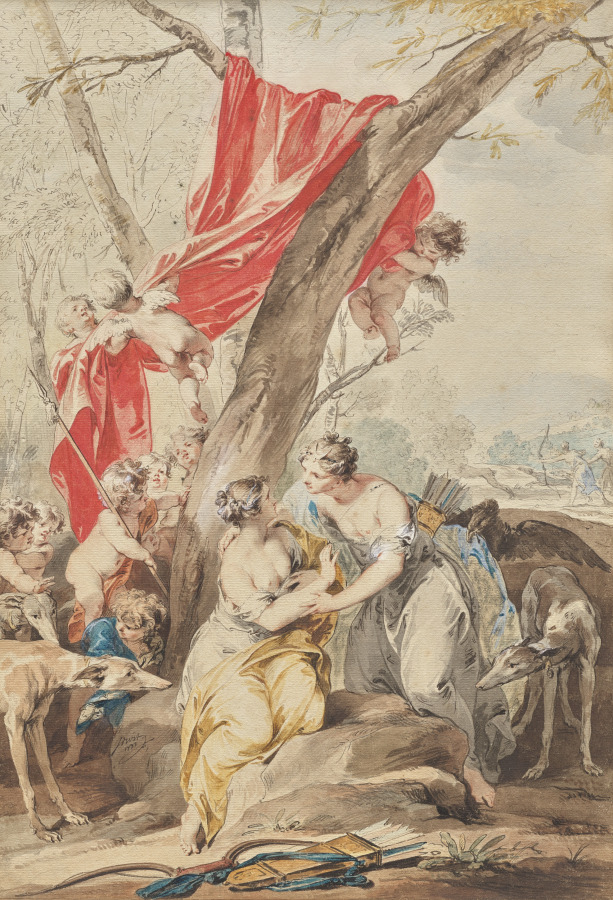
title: Jupiter (in the guise of Diana) and Callisto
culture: Netherlands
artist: Jacob de Wit (Dutch, 1695–1754)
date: 1733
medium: black chalk, pen and ink, brown and gray wash, watercolor, gouache, white heightening and brown ink framing lines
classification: Drawing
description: The beautiful Callisto was a follower of the goddess Diana. According to Ovid’s Metamorphosis, she was seduced by Jupiter, who fooled her by appearing in the guise of Diana. Here, the eagle at Diana’s back is the only indicator that Jupiter is present. Such scenes of the loves and misdeeds of the gods were popular in Amsterdam at the beginning of the 1700s, and Jacob De Wit’s primary employment was making large paintings destined for the dining and sitting rooms of stately homes. De Wit also made finished drawings, as here, which were prized for their fresh colors, easy movements, and playfulness.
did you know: The elegant hunting dogs in this composition appear in the background in a faint vignette that features Diana hunting a deer with a bow and arrow.